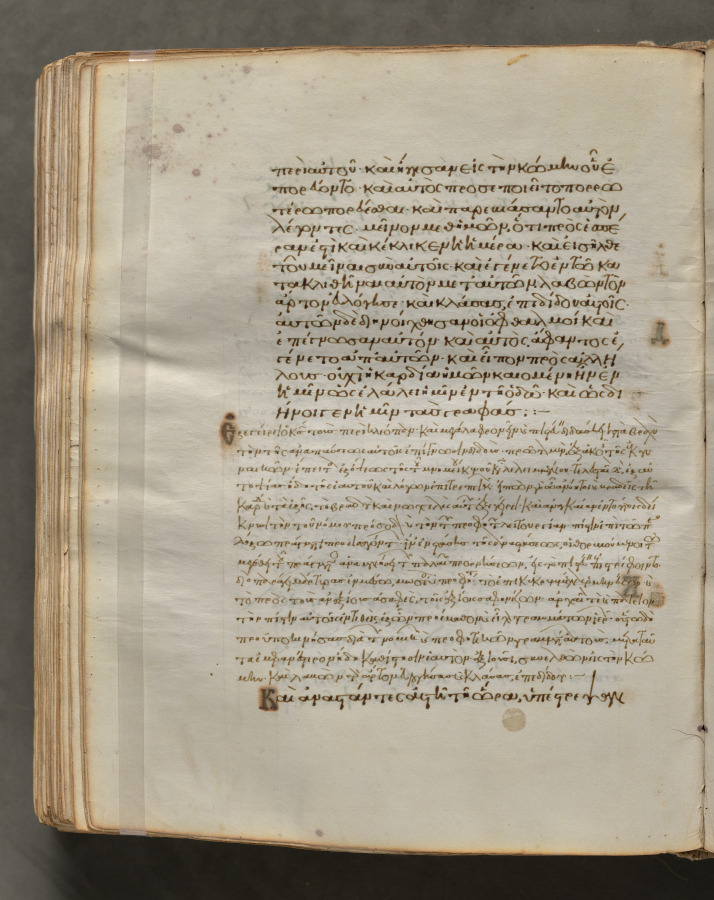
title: Text, folio 320 (verso), from a Gospel Book with Commentaries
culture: Byzantium, Constantinople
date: c. 1000–1100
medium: ink, tempera, and gold on vellum; leather binding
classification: Bound Volume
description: Each of the four gospels in this book opens on a page with brilliantly illuminated borders depicting the author of the text as well as birds—principally peacocks, symbols of the immortality of the soul—and fountains, representing the fountain of life and the salvation of the soul. This volume consists of 428 leaves with texts in Greek. Its level of sophistication suggests that it was probably written and decorated in a monastery in Constantinople.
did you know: Gospel books were carried in procession through Byzantine churches.